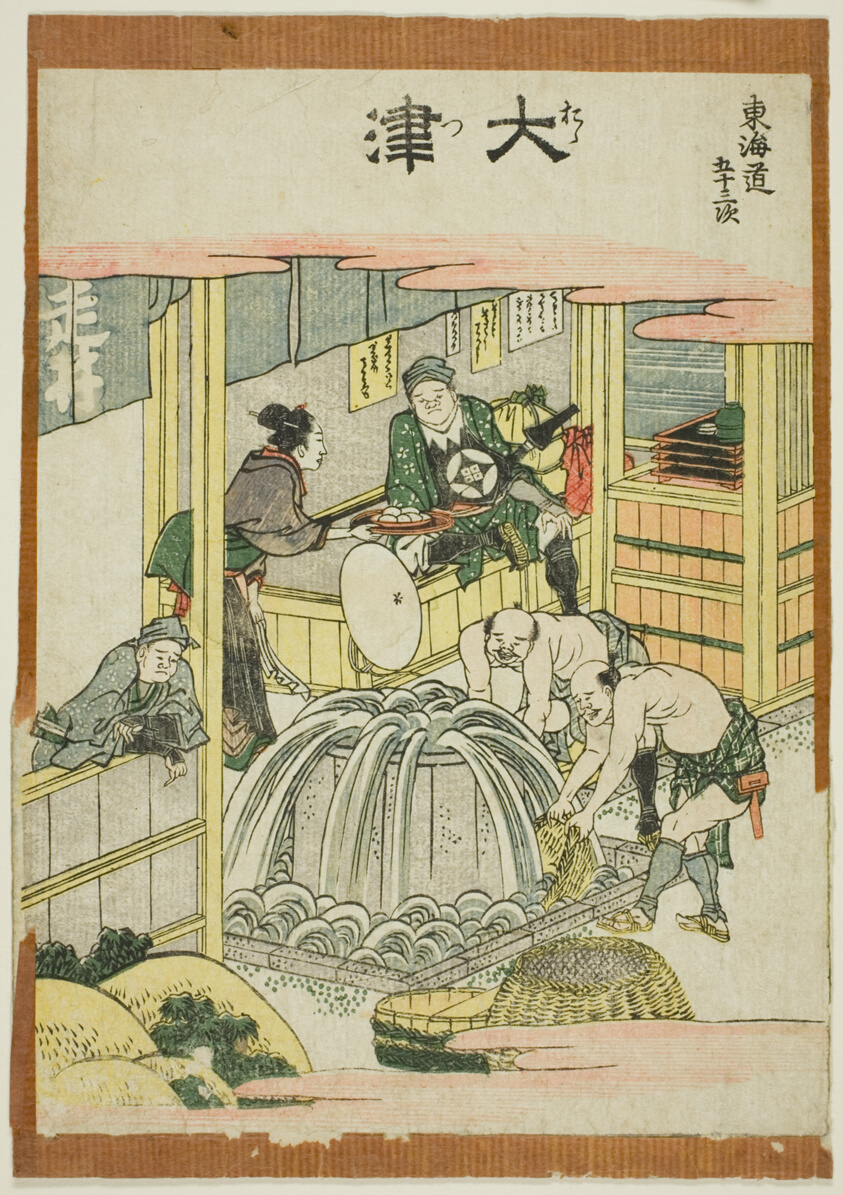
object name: Print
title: Otsu, from the series "Fifty-three Stations of the Tokaido (Tokaido gojusan tsugi)"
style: Japanese (culture or style)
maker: Katsushika Hokusai 葛飾 北斎; Japanese, 1760-1849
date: c. 1806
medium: Color woodblock print; chuban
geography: Japan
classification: woodblock print; print; asian art